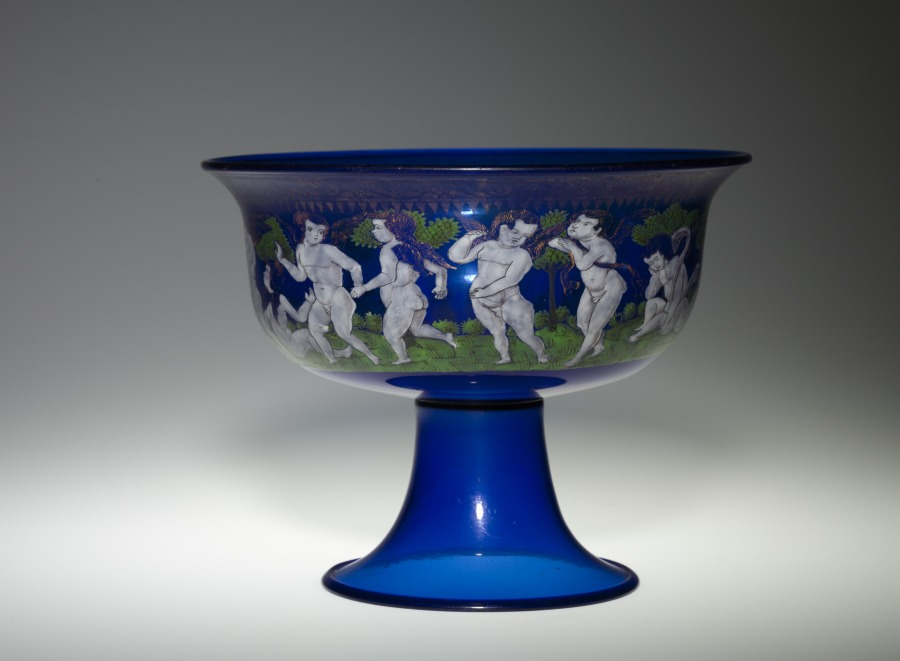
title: Tazza with a Frieze of Putti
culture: Italy, Venice (Murano), 19th century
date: 1800s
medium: enameled blue glass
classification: Glass